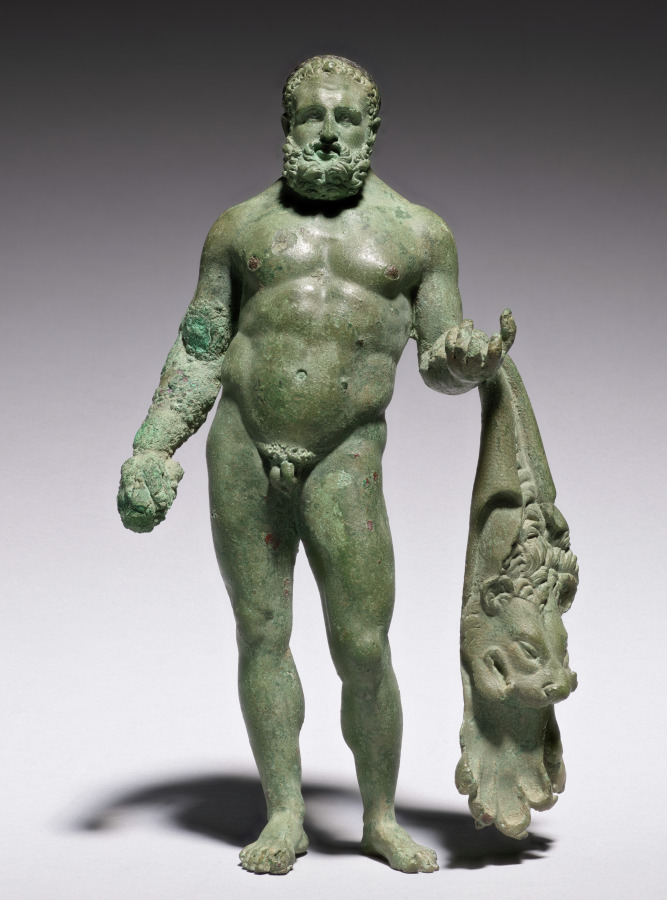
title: Hercules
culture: Italy, Rome, Early Imperial period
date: c. 30 BCE–20 CE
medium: bronze with silver and copper inlays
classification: Sculpture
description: This bronze statuette is a nude figure of the hero Hercules. He stands in a contrapposto pose, with the majority of his weight on one leg. Over his left arm, Hercules holds the skin of the Nemean Lion, having slayed the beast as part of his Twelve Labors and now carrying the pelt as a trophy. Although now mostly lost, Hercules once held his signature wooden club in his right hand. Roman artists often portrayed Hercules as middle-aged, as though greater maturity would increase his power and virility.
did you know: Hercules is the Roman name for the classical hero known in Greek as Herakles.